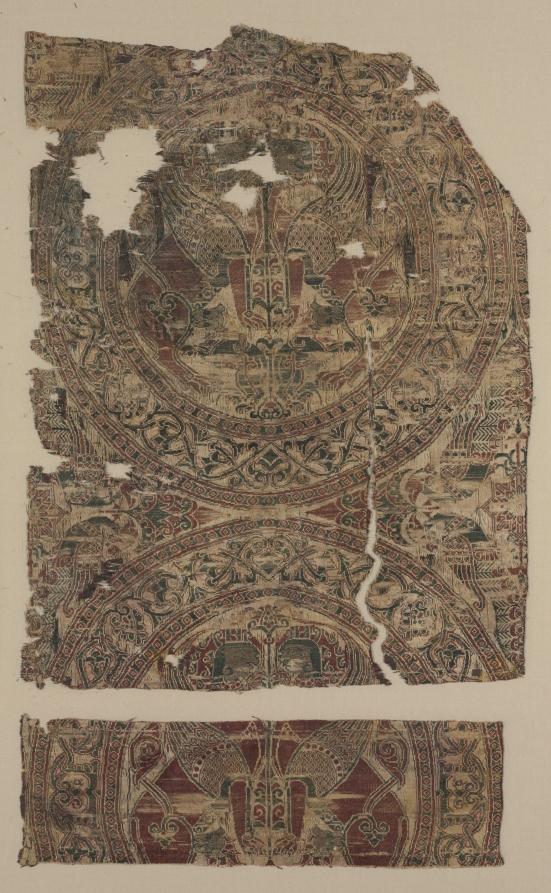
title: Fragment with confronted sphinxes in roundels from the tomb of Saint Bernard Calvo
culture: Spain, Almeria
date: 1200–43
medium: Silk and gold thread: lampas, taqueté, and plain-weave variant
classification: Textile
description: Composite creatures, such as winged lions and sphinxes, predate the rise of Islam in the Arabian Peninsula. Islamic textiles continued to include them for centuries after the Arab conquest of Spain. Pairs of lions with gold faces rear up to bite the haunches of the winged beasts. In between the roundels are pairs of peacocks, motifs traceable to pre-Islamic Persian art that spread throughout the Islamic world, including Spain. The body of Saint Bernard Calvo, the Catholic Bishop of Vich in 1233–43, was wrapped in textiles, including these fragments that still retain traces of his blood.